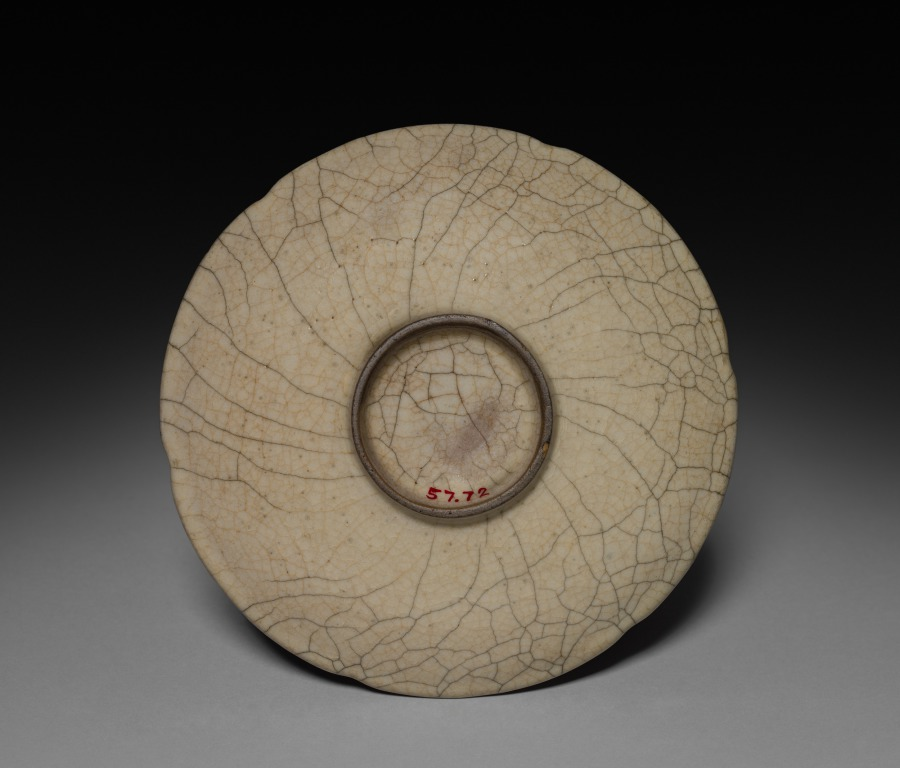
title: Lobed Dish: Guan ware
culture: China, Zhejiang province, Southern Song Dynasty (1127-1279) - Yuan Dynasty (1271-1368)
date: 12th-14th Century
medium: glazed buff stoneware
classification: Ceramic